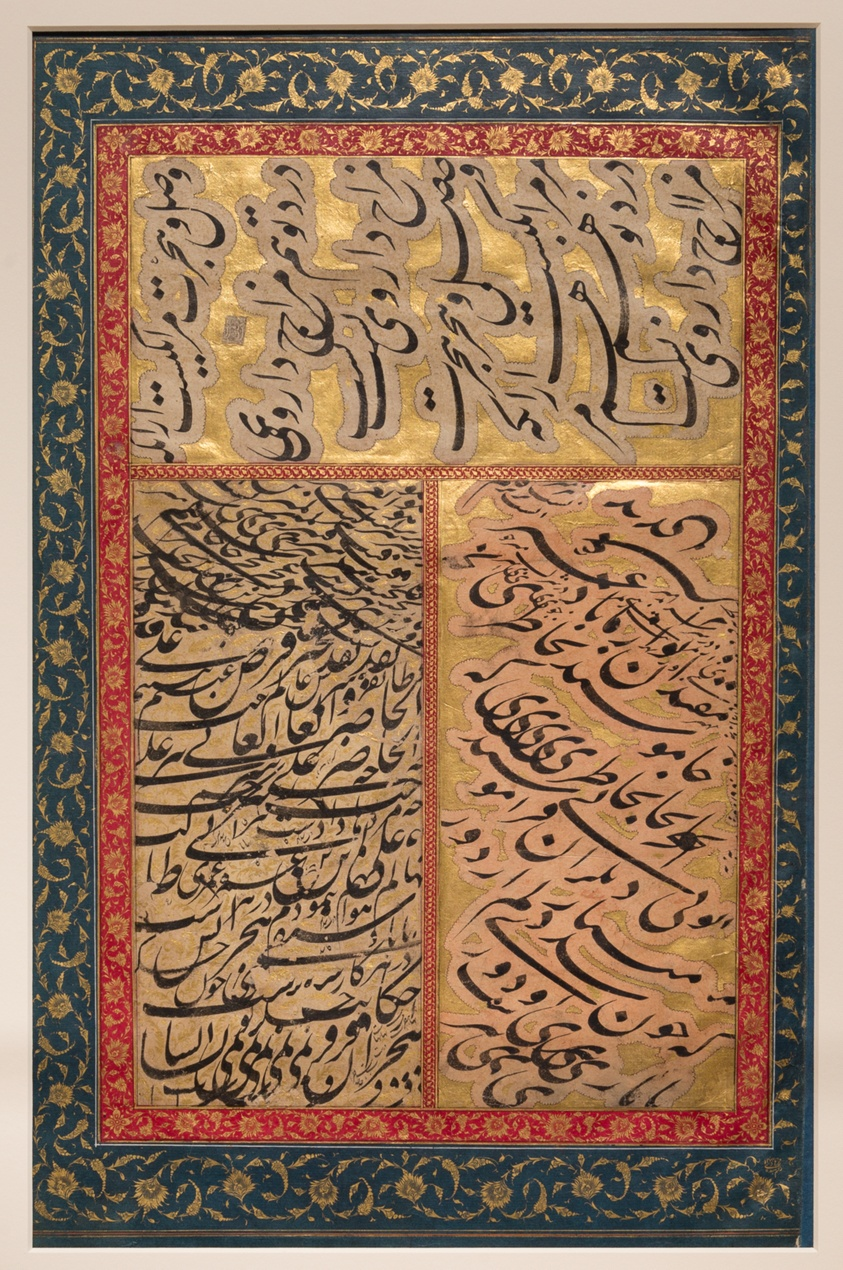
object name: Drawing and Watercolor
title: Page from the St. Petersburg Album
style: Islamic (culture or style)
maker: India and Iran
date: Portraits: Top left: Iran, c. 1740; top right: Iran, c. 1748; bottom left: India, 18th century; bottom right: India, 18th century; Calligraphy: Iran, late 16th century; Borders: Iran, mid–18th century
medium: Opaque watercolor, silver, and gold on paper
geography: India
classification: watercolor; painting; asian art